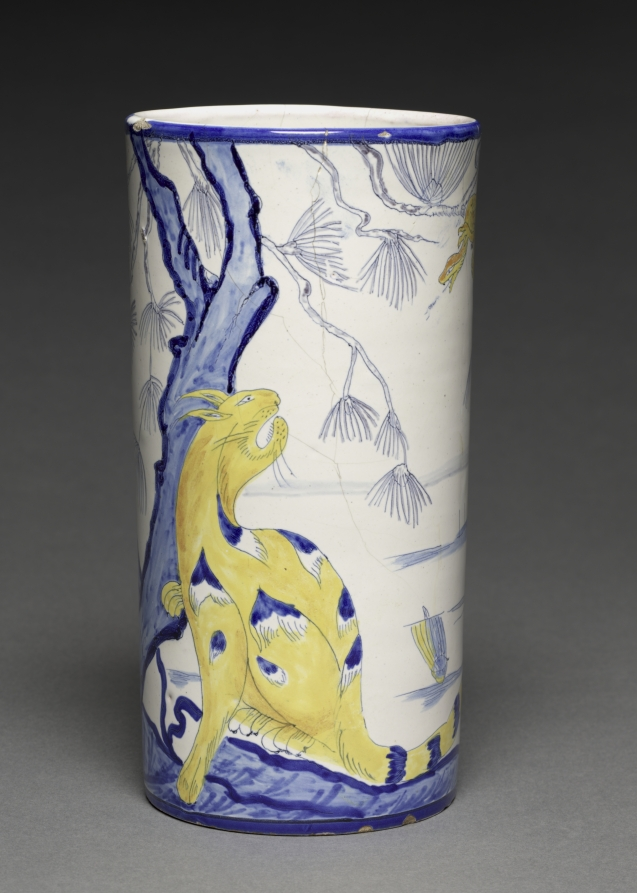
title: Vase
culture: France, 19th century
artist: Emile Gallé (French, 1846–1904)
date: c. 1885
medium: earthenware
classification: Ceramic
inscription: inscribed on tree trunk: "E Galle/Nancy."